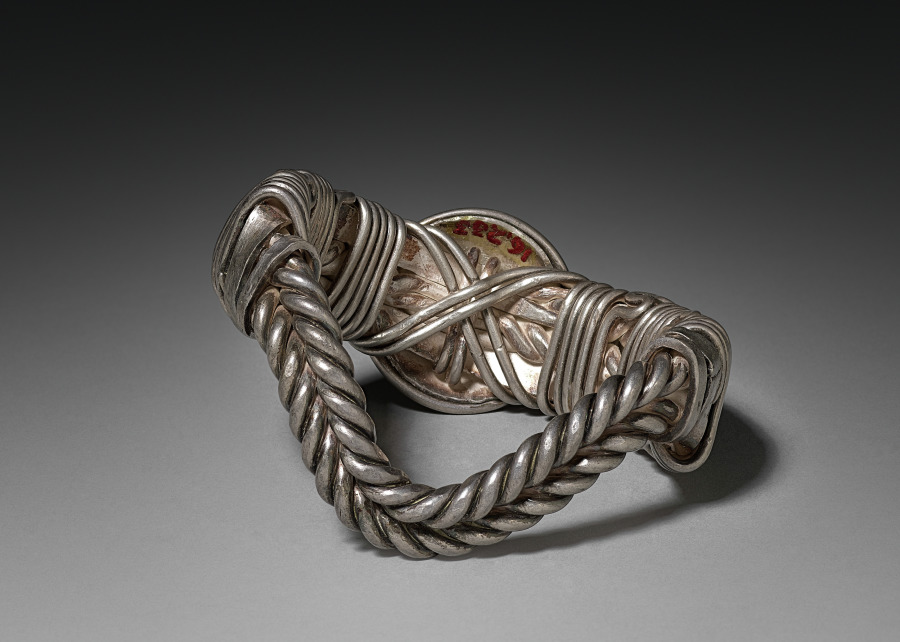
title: Armlet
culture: India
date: 1800s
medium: silver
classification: Jewelry